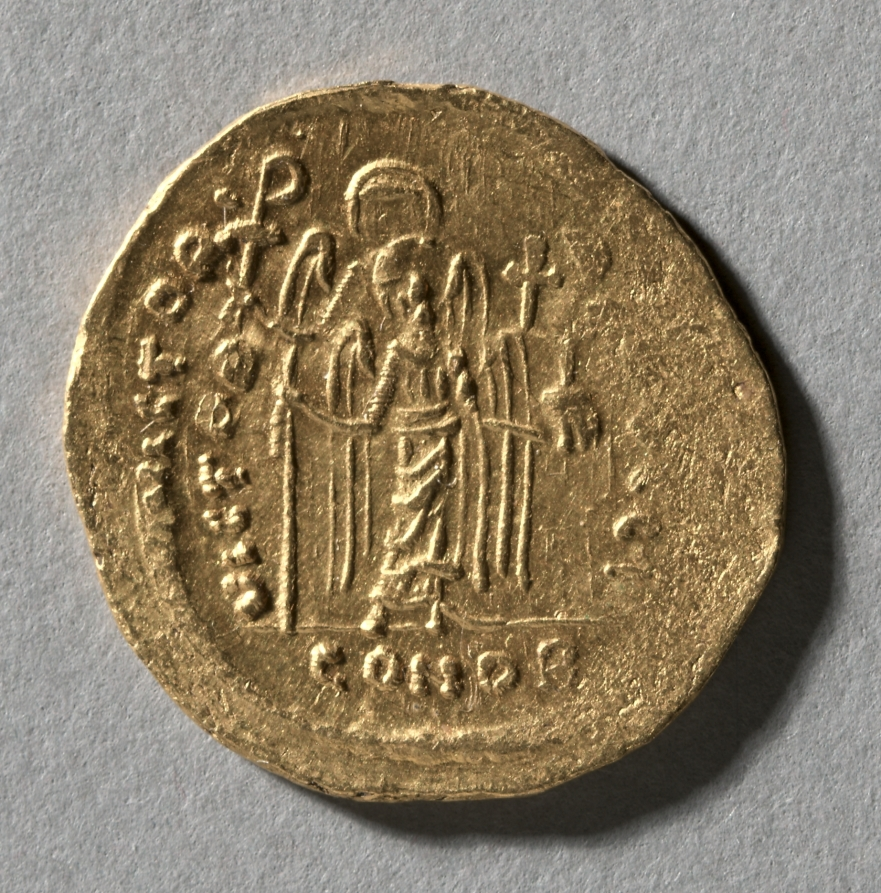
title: Solidus of Maurice Tiberius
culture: Byzantine, 6th-7th century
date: 583–602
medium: gold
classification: Coins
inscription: (Avers): DN MAVRC TIbPPAV[C] (Revers): VICTOR[I] AAVC[CI] and CONO[B]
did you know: The solidus coin was first made in AD 301 in Rome.